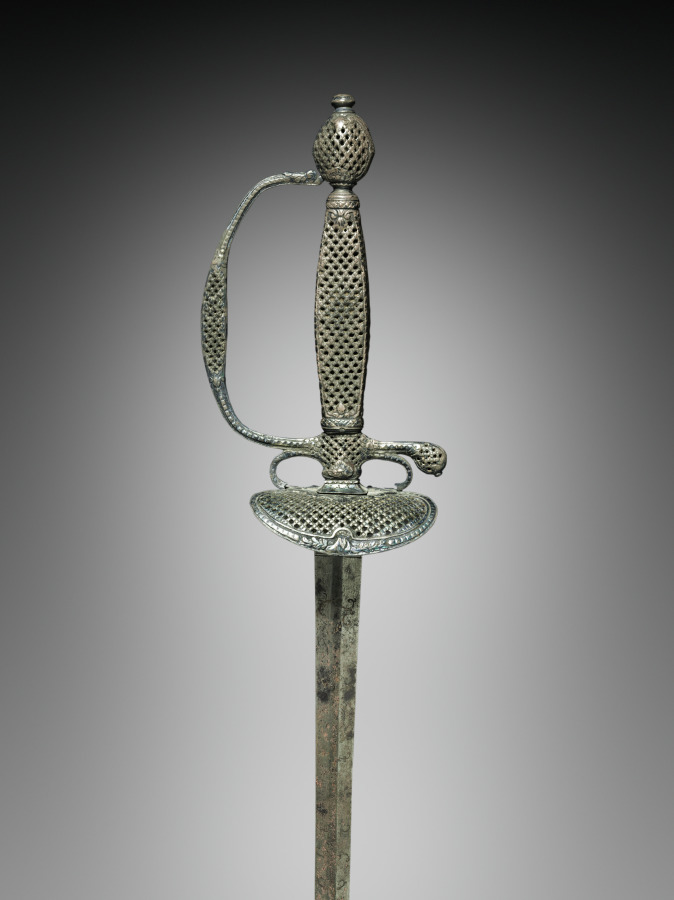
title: Child's Sword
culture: France, Paris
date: c 1780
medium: stainless steel, silver and brass wire inlay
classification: Arms and Armor